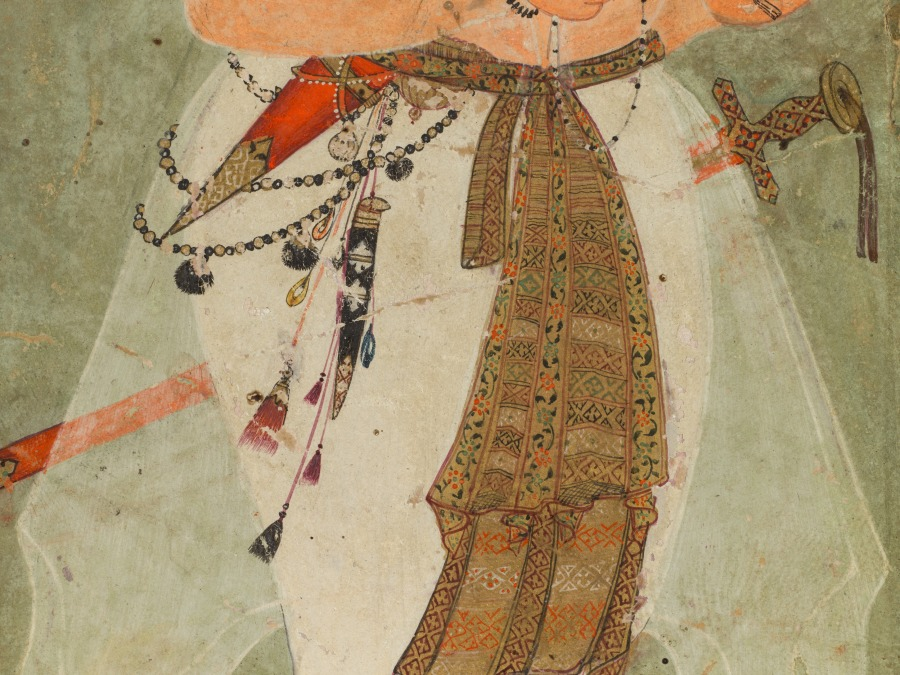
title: A Mughal Prince, Perhaps Danyal, Holding a Sprig of Flowers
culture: Mughal India, court of Akbar (reigned 1556–1605)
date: c. 1580–90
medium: Gum tempera and gold on paper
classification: Painting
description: Prince Danyal (1527–1605), the emperor Akbar’s youngest son, is said to have been his favorite. Danyal served his father as a military officer, leading contingents to the Deccan plateau in southern India, until he succumbed to an untimely death of alcoholism; Akbar himself died later that year. Here, Danyal wears the thumb ring of an archer and grasps a white flower in his hand, recalling his epithet, Nosegay of Fortune’s Spring. In his right hand he holds prayer beads. A sword, knife, and dagger hang from his sash. This early Mughal portrait depicts him as he appeared in his mid-teens.